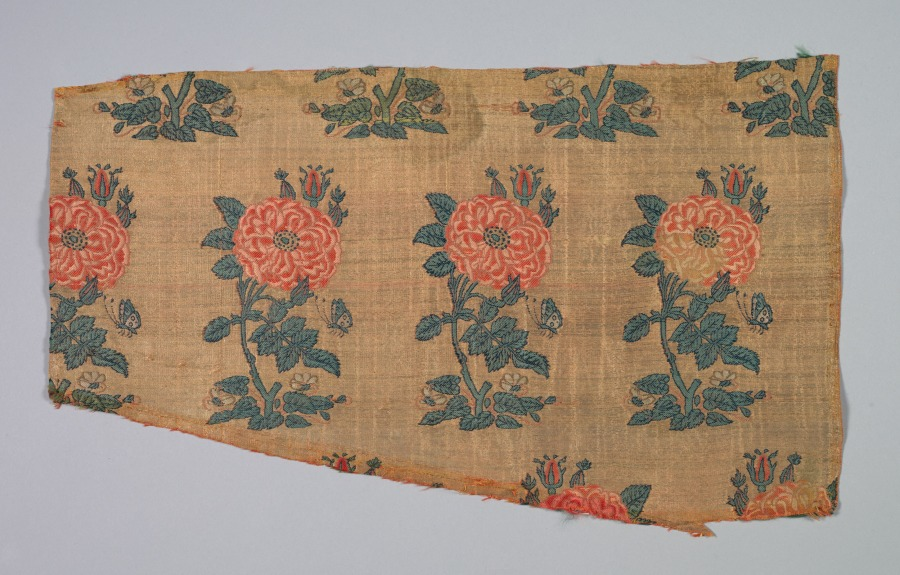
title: Sleeve with rose bushes and butterflies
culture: Iran, Safavid period (1501–1722)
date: early 1600s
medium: silk and gilt-metal thread: taqueté ground with twill pattern, brocaded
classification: Textile